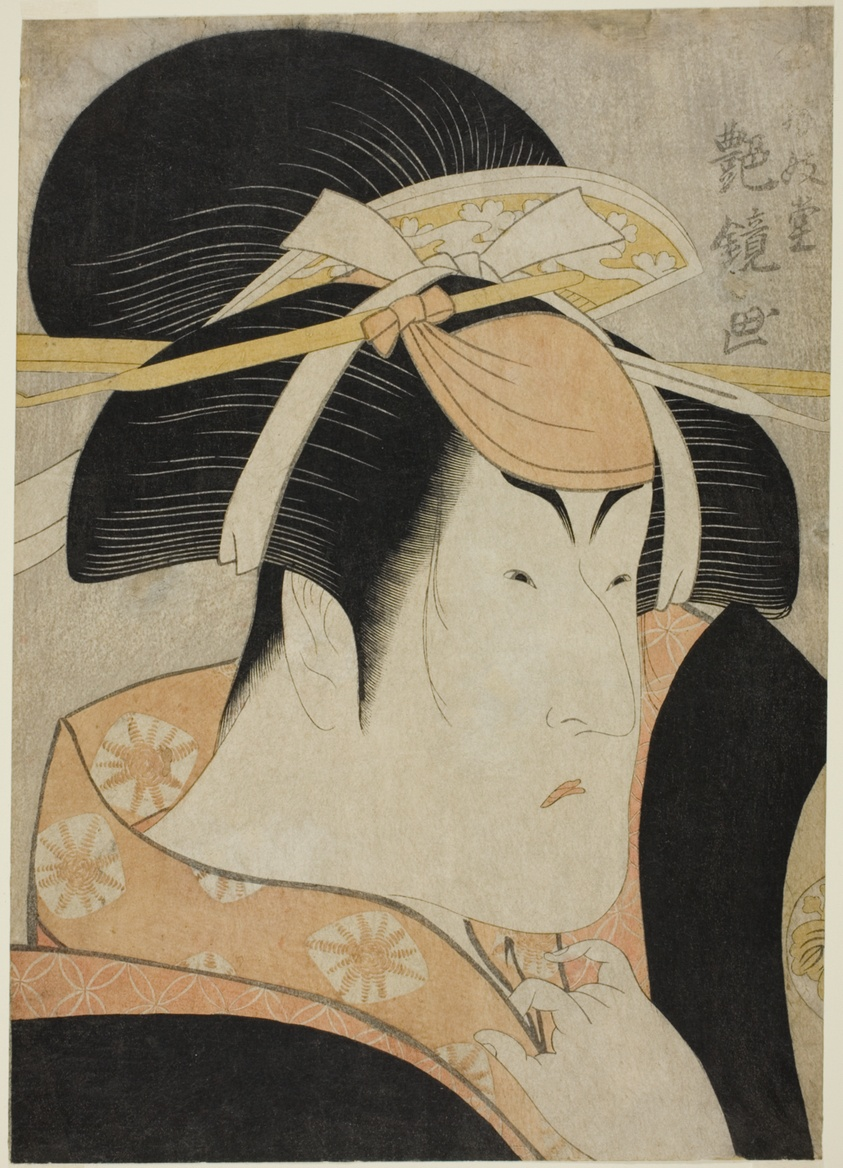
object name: Print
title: Nakayama Tomisaburo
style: Japanese (culture or style)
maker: Enkyo (Japanese, 1749-1803)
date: c. 1800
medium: Color woodblock print; oban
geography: Japan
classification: woodblock print; print; asian art